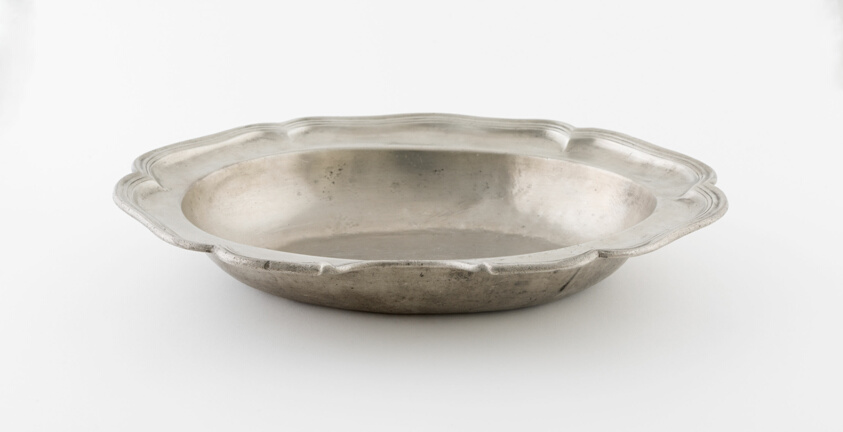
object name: Metalwork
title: Basin (possibly for use with lavabo)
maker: Germany or Switzerland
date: Mid 18th century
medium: Pewter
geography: Germany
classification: dish (vessel); pewter; metalwork; european decorative arts